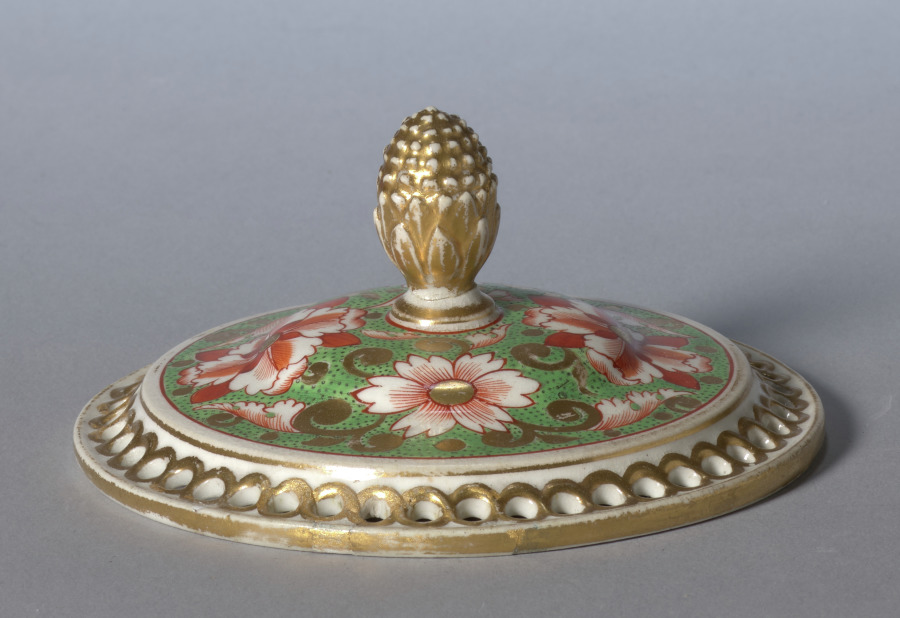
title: Cover for a Potpourri Vase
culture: England, Derby, 19th century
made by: Derby (Crown Derby Period) (British)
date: c. 1810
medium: porcelain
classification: Ceramic